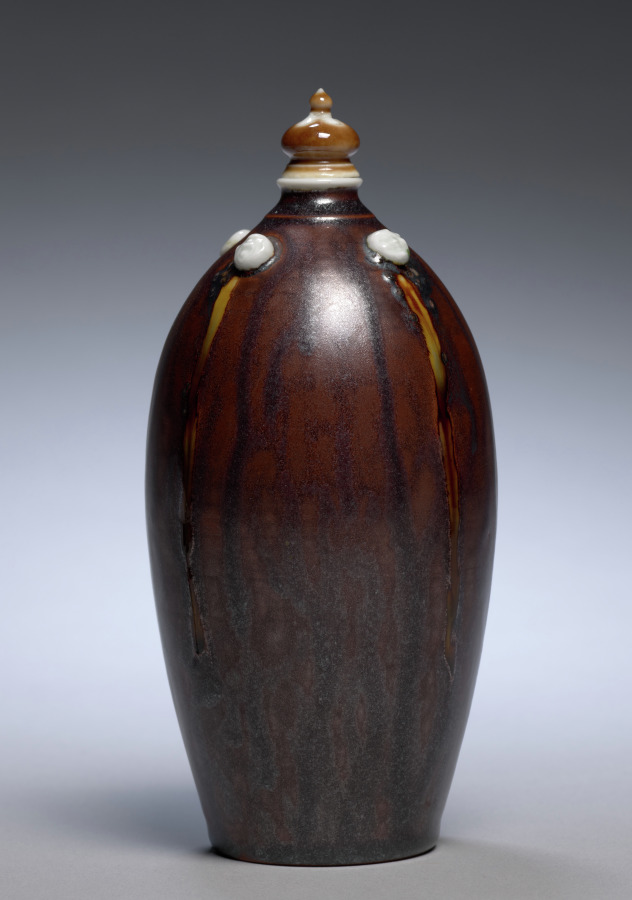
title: Covered Vase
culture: France, 20th century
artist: Sèvres Porcelain Factory (French, est. 1756)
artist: Taxile Maximin Doat (French, 1851–1939)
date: 1901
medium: porcelain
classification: Ceramic